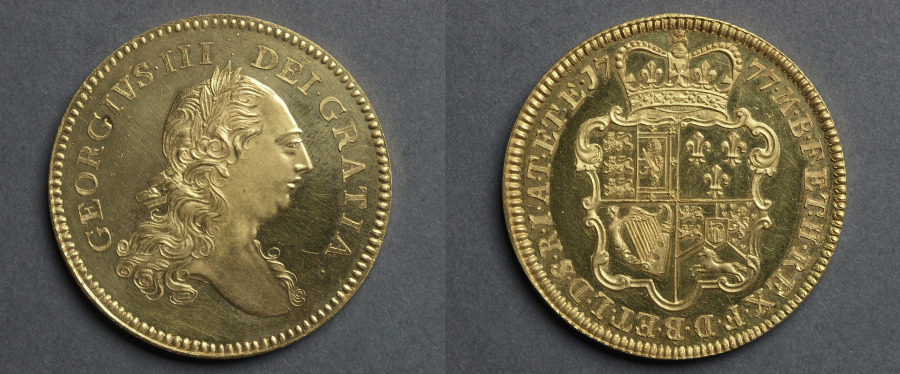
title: Five Guineas: George III (obverse); Shield of Arms (reverse)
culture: England, George III, 1760-1820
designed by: Richard Yeo (British, 1720–1779)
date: 1777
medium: gold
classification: Coins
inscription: DEI . GRATIA . GEORGIVS . III.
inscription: M.B.F.ET.H.REX.F.D.B.ET.L.D.S.R.I.A.T.ET.E 17 77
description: This is an extremely rare piece and one demonstrating the ability of the artist. Richard Yeo was appointed assistant engraver at the Royal Mint in 1749, chief engraver in 1775, and died in 1779. He was responsible for a large number of pattern pieces and for some of the currency coins of the period.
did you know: A pattern piece, this coin was not made for circulation.